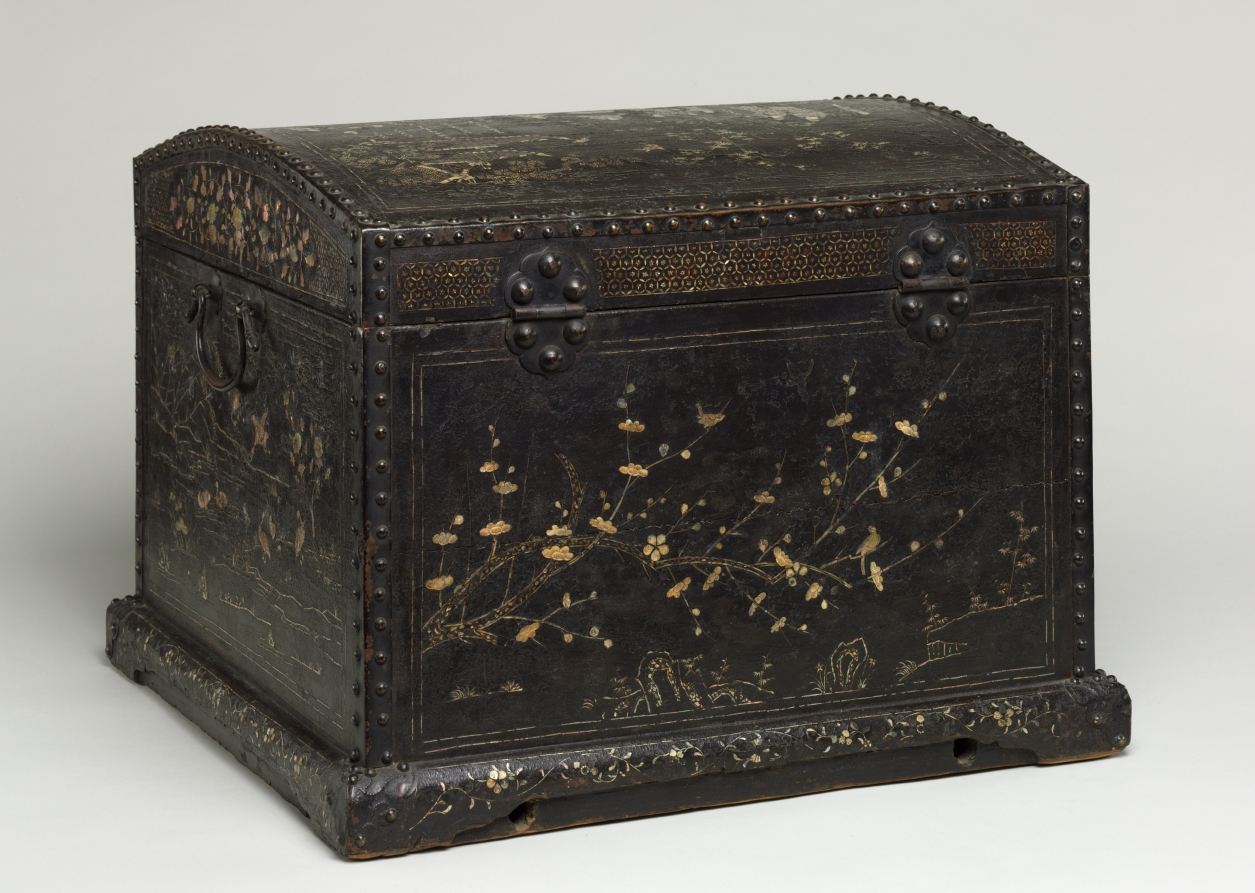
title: Chest for Storing Garments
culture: China, Ming dynasty (1368–1644)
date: 1400s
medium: lacquered wood with mother-of-pearl inlay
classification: Lacquer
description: This precious lacquer box is decorated with bird and plant motifs and figures in mother-of-pearl inlay. The decoration depicts the leisurely pursuit of scholars in nature and a garden setting. Scholars play the board game weiqi, have philosophical conversations, pluck a qin (a zither-like instrument with strings), and read books. Lacquer chests of this type were used to store garments neatly folded along their straight seams. The mother-of-pearl inlay from shells is a technique that was typically practiced by craftsmen in Hangzhou and other parts of southeast China near the sea.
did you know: Lacquer chests of this type were used to store garments.